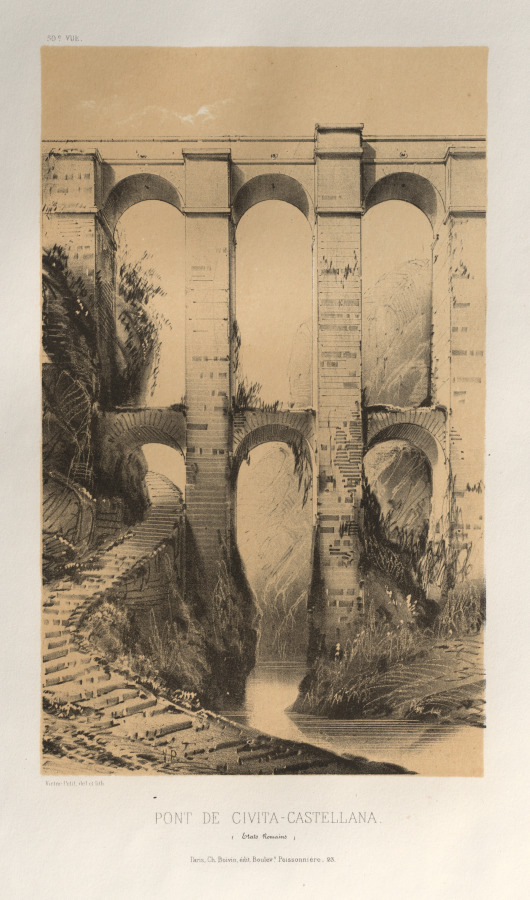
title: Architecture Pittoresque ou Monuments des XVeme. Et XVIeme. Siecles: Chateaux de France des XV et XVI Siecles: Pl. 50, Pont De Civita-Castellana (Etats Romains)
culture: France, 19th century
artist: Victor Petit (French, 1817–1874)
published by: Charles Boivin (publisher and editor); Lith de Godard a Paris (printer)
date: 1860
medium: lithograph with tint stone, from portfolio of 100 lithographs with tint stone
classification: Print